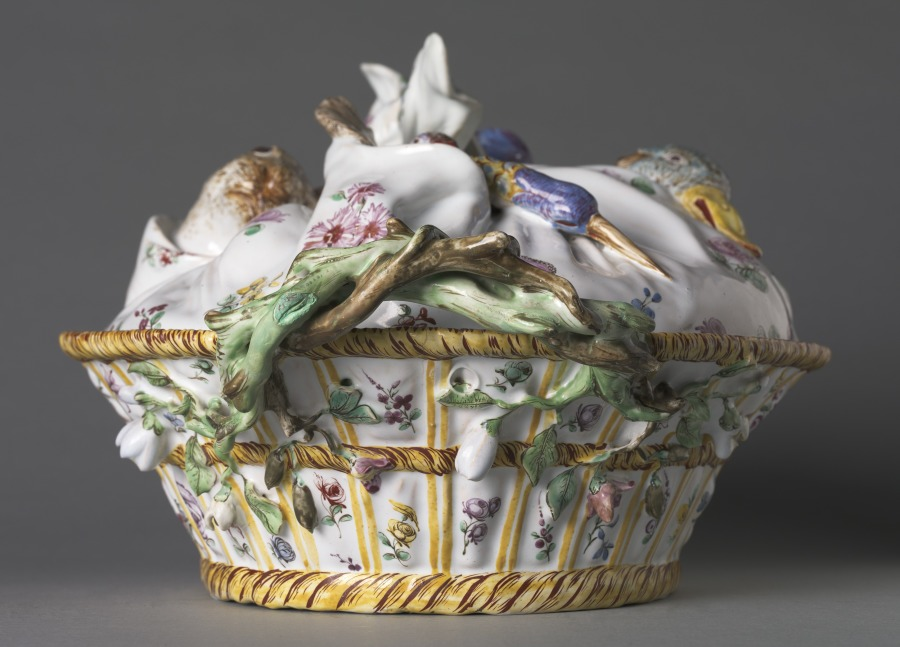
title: Covered Tureen in the Form of a Basket of Game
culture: France, 18th century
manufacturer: Sceaux Factory (French, active 1748–66)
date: c. 1755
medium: Tin- glazed earthenware (faience) wth enamel decoration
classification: Ceramic